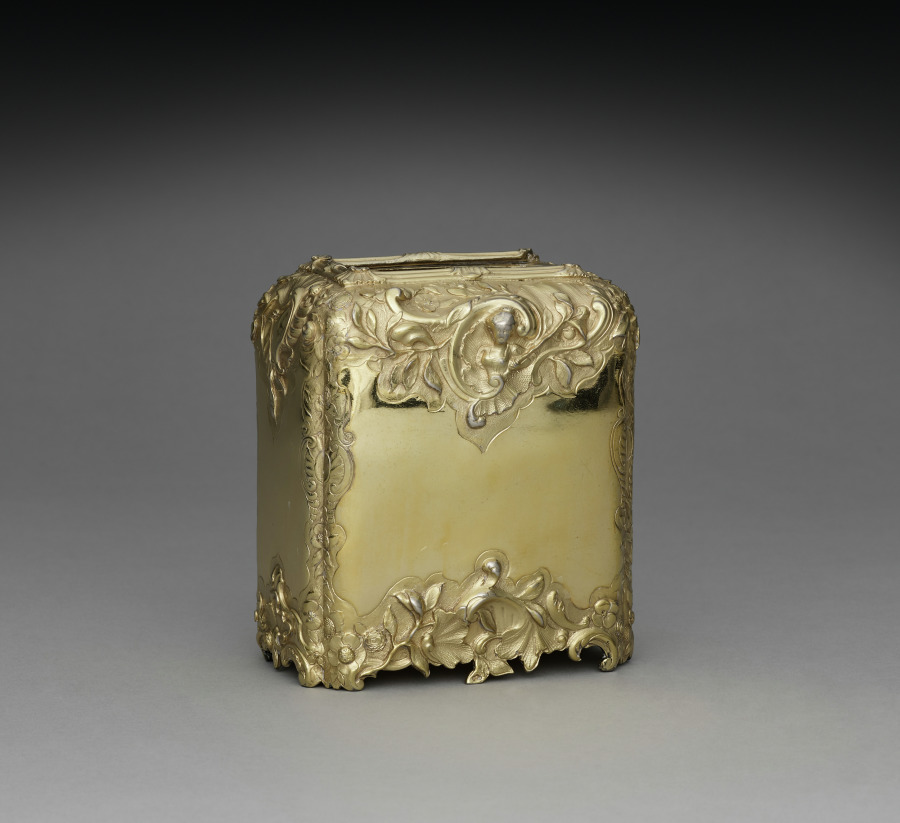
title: Tea Caddy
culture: England, London, 18th century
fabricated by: Paul Jacques de Lamerie (British, 1688–1751)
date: 1741–1742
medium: silver gilt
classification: Silver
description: In the 1600s and 1700s, silver played a significant role in projecting wealth, status, power, and ritual in British life. Tea was likewise a highly valued commodity, and as such, silver caddies like this one were designed to display the social distinction of its owner. This canister’s prominently sloping shoulders were designed by Paul Jacques de Lamerie in the early 1730s and became a standard form for tea caddies by the end of the decade.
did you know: This tea caddy is accompanied by a lid. See cover record.